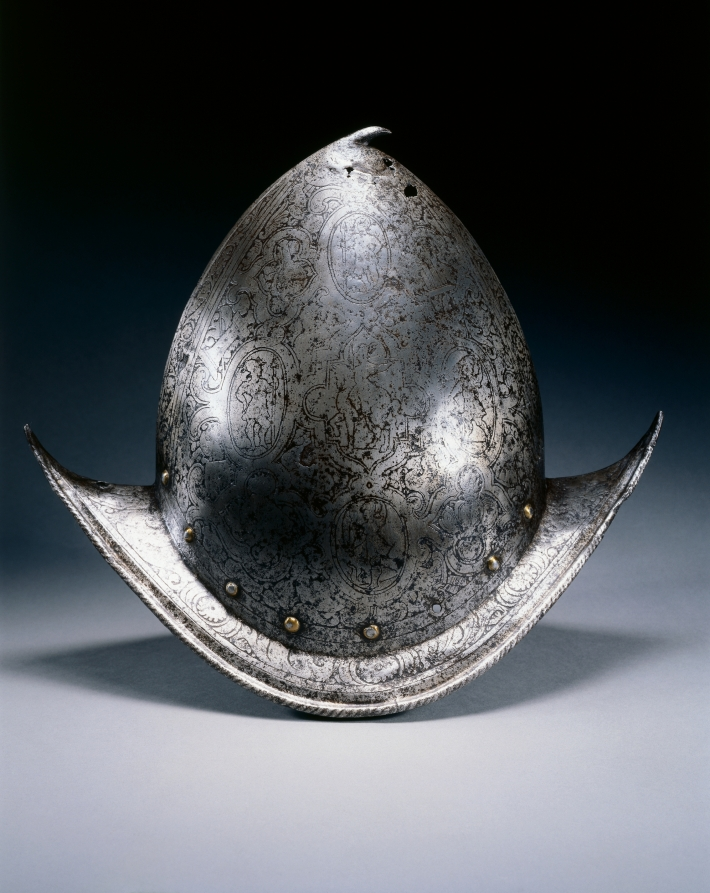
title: Pear Stalk Cabasset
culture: North Italy, Brescia(?), late 16th Century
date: 1580–1600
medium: steel, etched, roped edge and brass rivets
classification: Arms and Armor